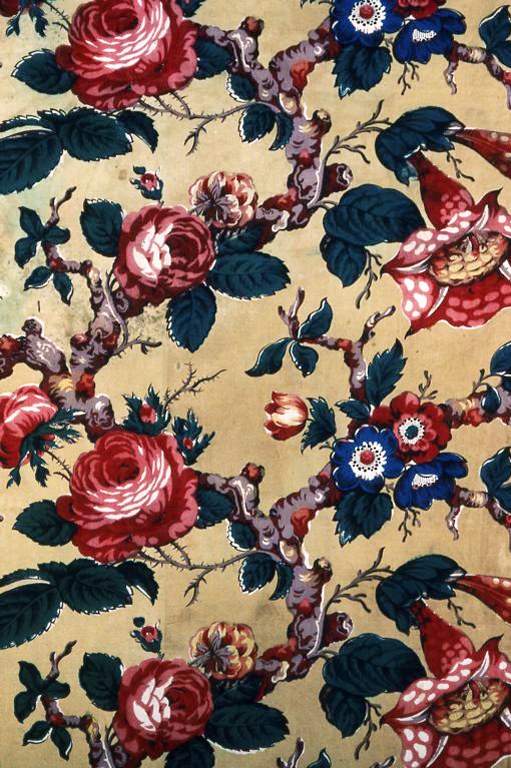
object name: Textile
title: Two Panels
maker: England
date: 1872/86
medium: Cotton, plain weave; printed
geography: England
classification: textile; weaving - printed; weaving